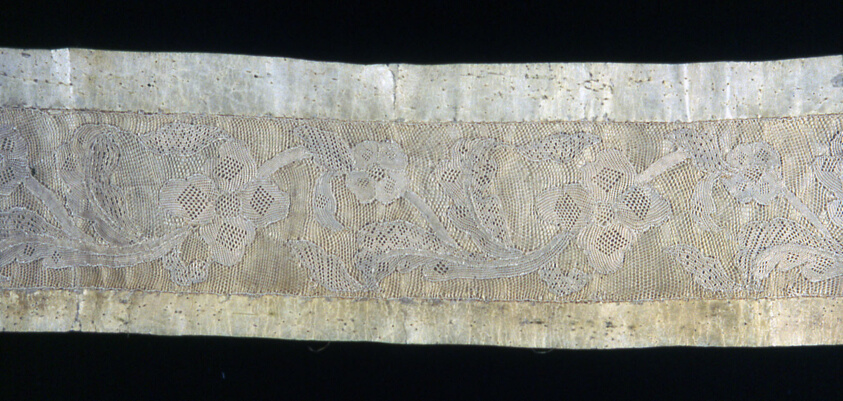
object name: Textile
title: Two Borders on Parchment (Incomplete)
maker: Italy, Venice or Burano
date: 1775/1825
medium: Silk, sisal on parchment, needle lace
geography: Italy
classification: textile; needlework - lace; lace - needle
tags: flowers